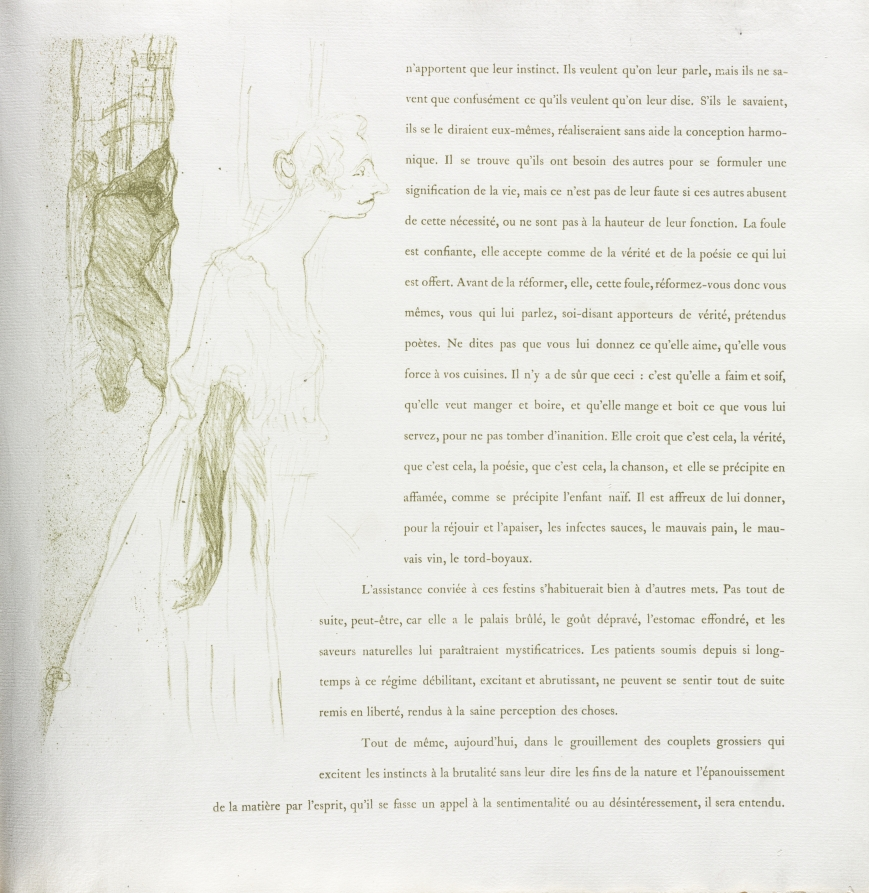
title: Yvette Guilbert-French Series: No. 11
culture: France, 19th century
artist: Henri de Toulouse-Lautrec (French, 1864–1901)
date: 1894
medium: lithograph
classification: Bound Volume